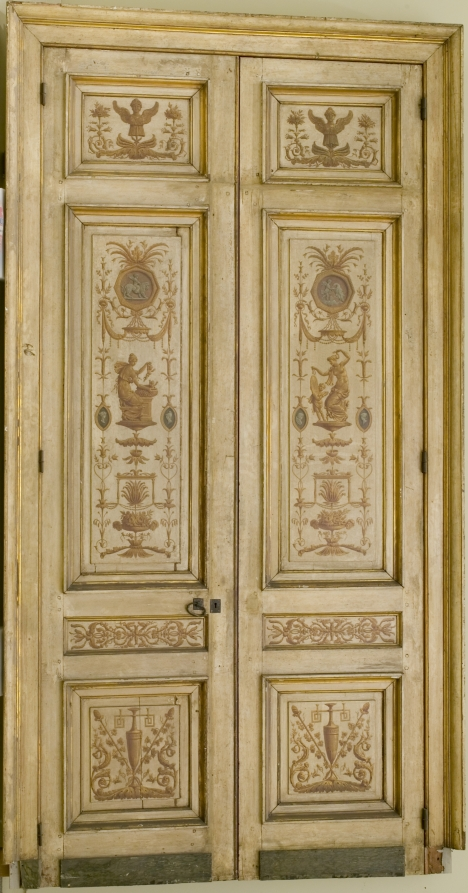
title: Overdoor Painting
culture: France, 18th century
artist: Pierre Rousseau (French, 1751–1829)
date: 1790s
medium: oil on canvas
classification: Painting